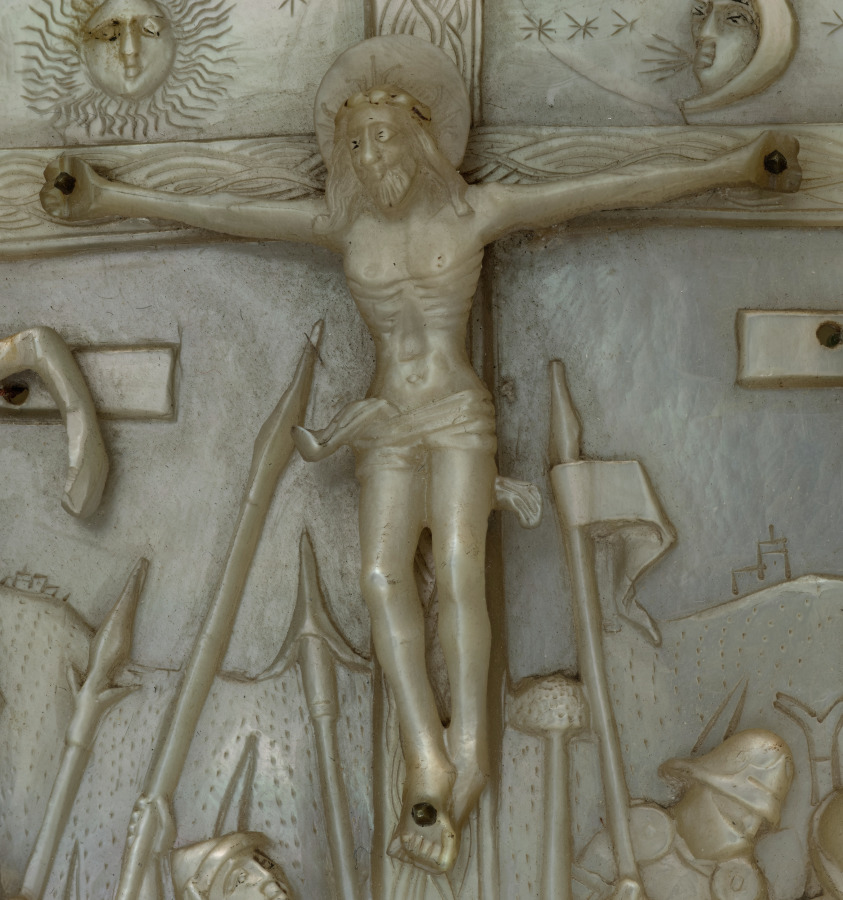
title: Calvary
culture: Germany, Middle Rhine?, 15th century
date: c. 1450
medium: mother-of-pearl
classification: Sculpture